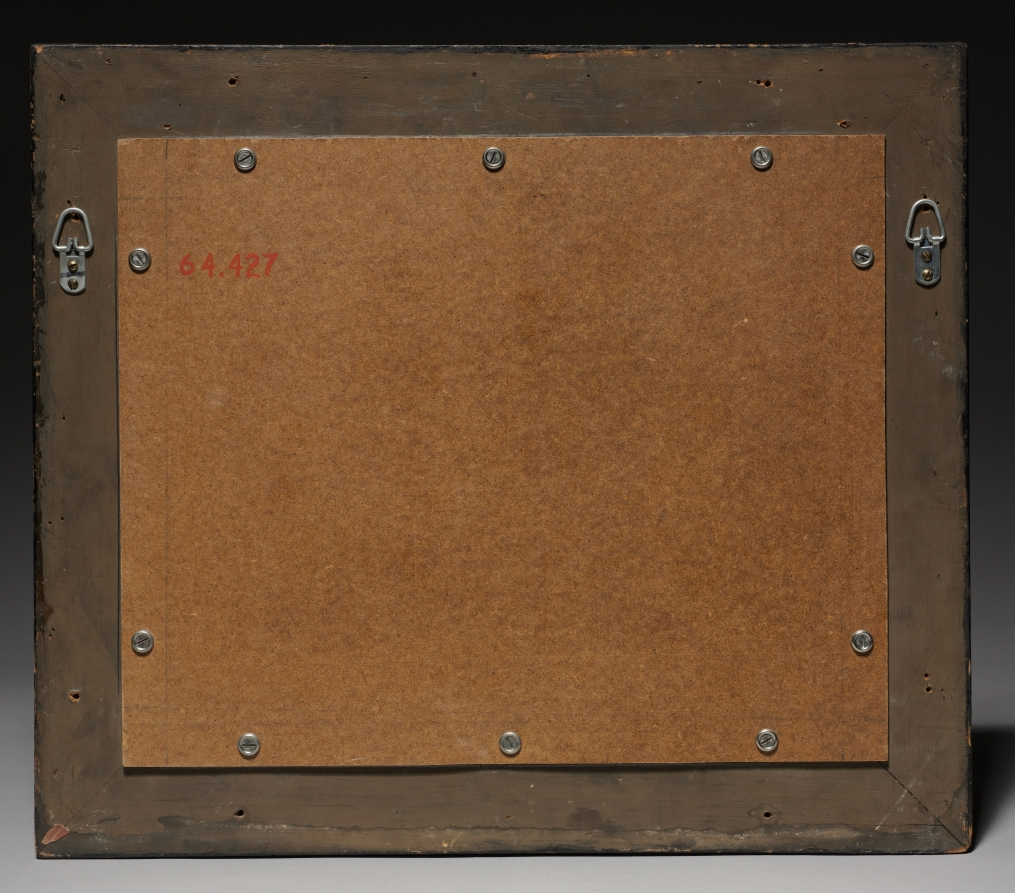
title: Rest on the Flight into Egypt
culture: Italy, Bologna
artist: Giuseppe Mazza (Italian, 1653–1741)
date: c. 1700–1710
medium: terracotta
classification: Sculpture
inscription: inscription in lower left corner: "G.M."